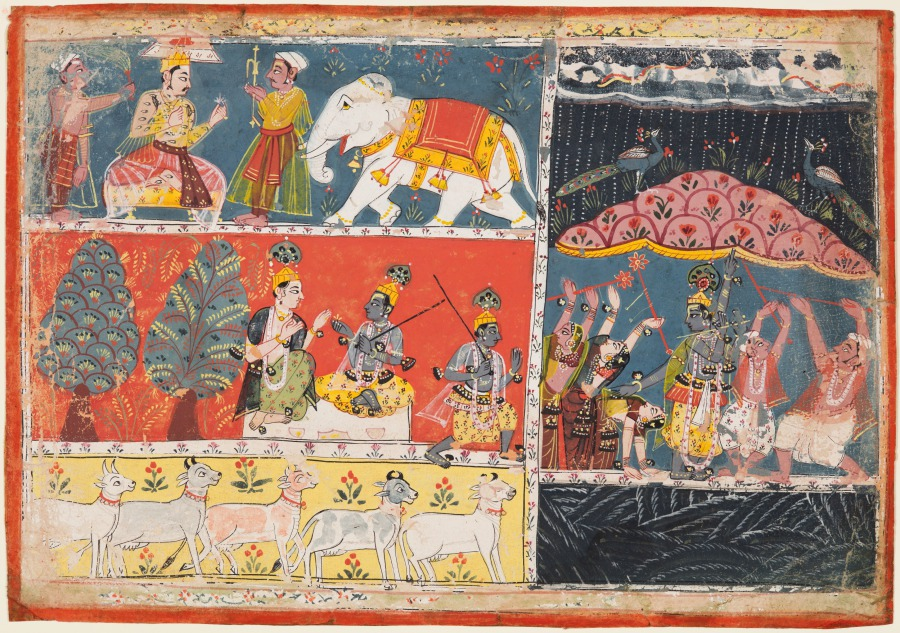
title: Krishna Lifts Mount Govardhan, from a Bhagavata Purana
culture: Central India, Madhya Pradesh, Malwa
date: 1686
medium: Gum tempera on paper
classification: Painting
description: After Krishna convinced the dwellers of the cowherd village in Braj to not give the annual offering to Indra, king of the gods, an enraged Indra flooded the village with heavy rainfall. Krishna, shown with four arms, lifted nearby Mount Govardhan, and the villagers took shelter underneath. The painting depicts a heavy torrent of rain, and in the upper left, Indra sits enthroned with two attendants and his white elephant mount.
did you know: The “hundred-eyed” Indra wears the garments of a Mughal emperor, with his tunic tied under the right arm.